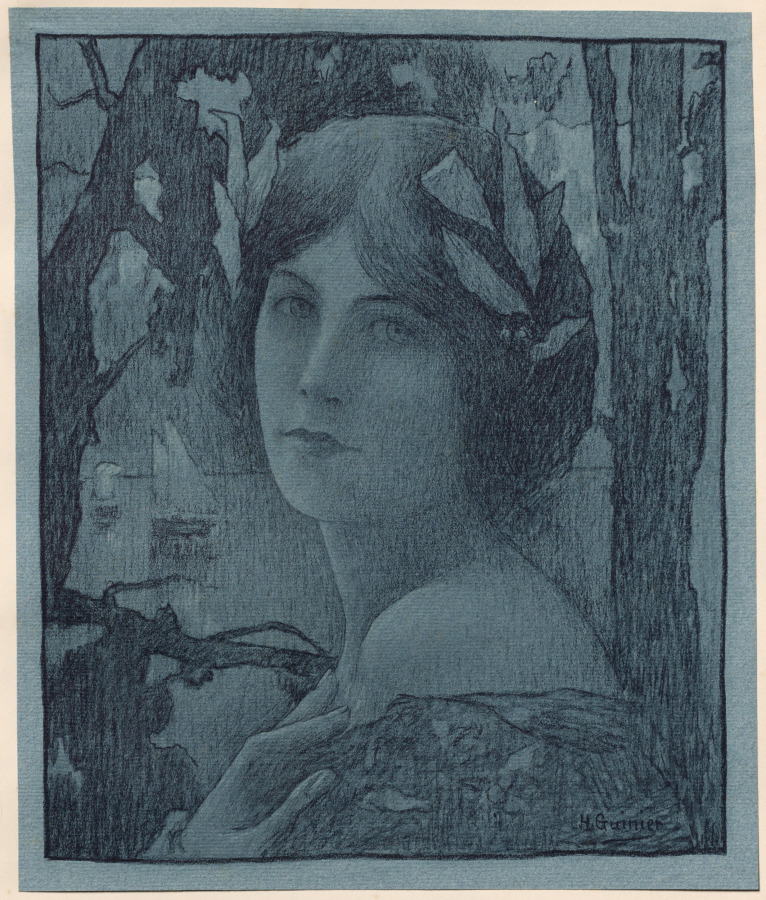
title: Nuit Douce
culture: France, Paris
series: L'Estampe Moderne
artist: Henri-Jules Guinier (French, 1867–1927)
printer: Imprimerie Champenois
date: 1899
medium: color lithograph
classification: Bound Volume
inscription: lower right of image, printed: H. Guernier; lower right of secondary support: blindstamp of L'Estampe Moderne (Lugt 2790)